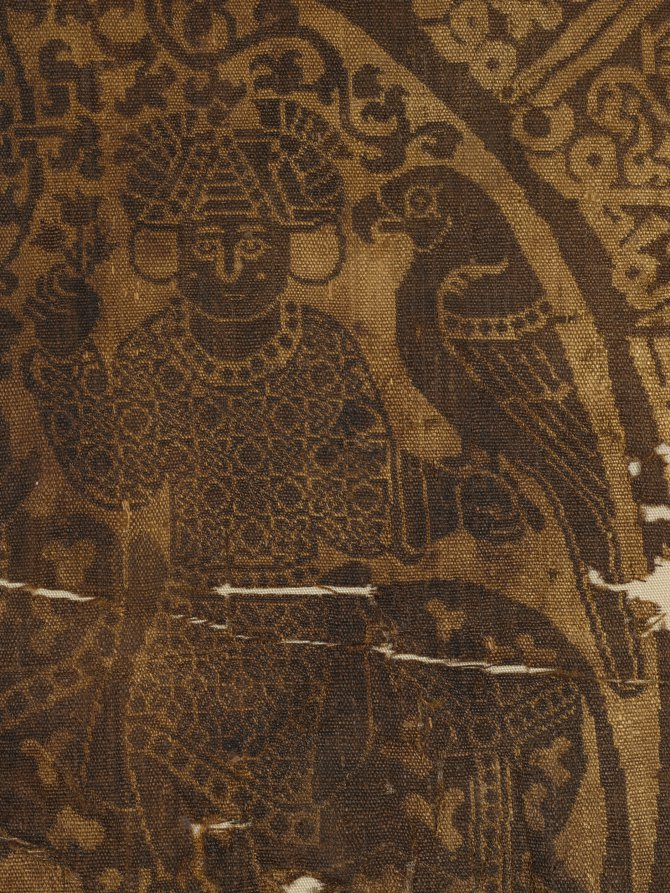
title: Fragment with falconer riding a bull in a rondel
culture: Iran, Rayy, Seljuk period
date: 1000s–1100s (radiocarbon date, 95% probability)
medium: Silk: double cloth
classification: Textile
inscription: inner band of a foliate Kufic inscription: ". . . . . . wa-bastah wa-'ala['] lil-shay[kh?] al-sayyid al-mansur al-mu['a] yyad Abi Nasr . . . bin[?] . . ."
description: The princely sport of falconry was frequently represented in medieval luxury silks. Here, the falconer wears a jeweled turban, the most significant item of men’s dress, and rides sidesaddle on a bull. His tunic displays two small designs: overlapping octagons and the conventional star and cross motif. On his gloved hand, he probably supports a coveted gyrfalcon, a large, superior bird. The border displays an inner inscription and an outer animal procession, an ancient Near Eastern theme, of real and mythical creatures. This double cloth has two distinct layers that exchange position according to the pattern. The crisply broken edges and scattered brittle threads are typical of the fragility of authentic medieval Iranian silks.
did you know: The falconer's round face with delicate features represents the ideal Iranian beauty, complemented by the chic round hairballs beside his cheeks.